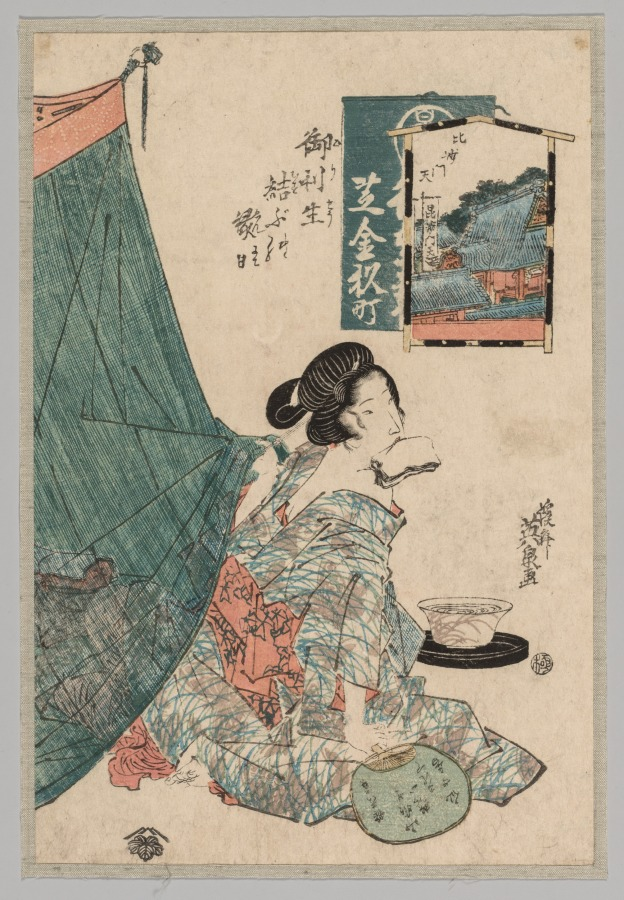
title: Woman with Papers in Mouth and Fan in Hand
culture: Japan, Edo period (1615–1868)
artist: Keisai Eisen (Japanese, 1790–1848)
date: 1789–1851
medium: color woodblock print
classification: Print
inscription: Signature: Keisai Yeisen